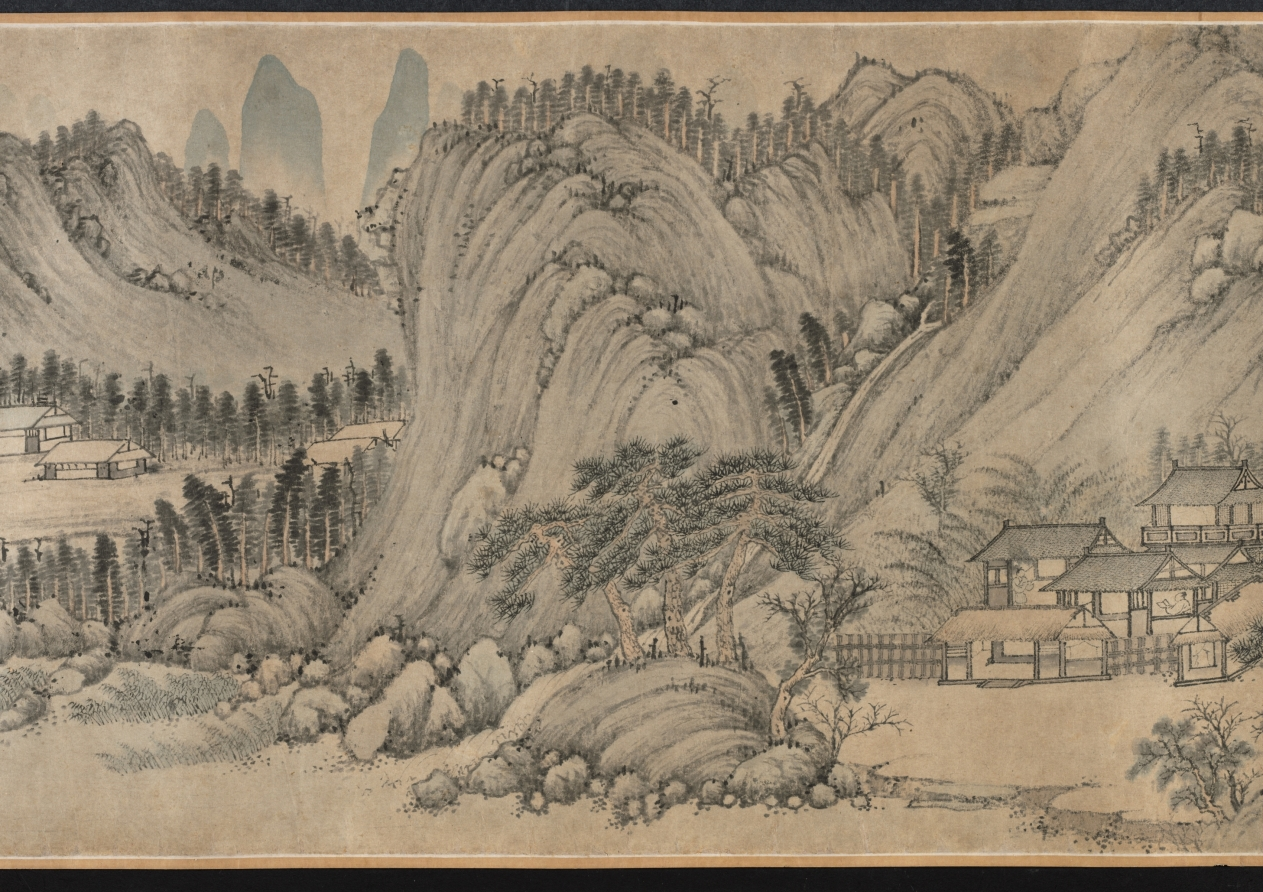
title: Mt. Taibo in the Style of Wang Meng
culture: China, Ming dynasty (1368–1644)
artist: Du Qiong (Chinese, 1396–1474)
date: 1442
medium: handscroll; ink and light color on paper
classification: Painting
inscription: Artist's inscription, signature, and 11 seals: [1 seal] Tung-yüan chai. Huang-ho-shan-ch'iao [Wang Meng] painted a painted called T'ai-po Mountain. Its brushwork is superior and admirable, which is very close to Yu-ch'en [Wang Wei, 699-759]. The cleverness of its composition, the maple groves and rustic temples, the inaccessible ravines and autumnal plateaus, the periolous peaks and strange rocks, etc., all seem to be so natural. The paper is only a little over eight feet, but the landscape has the range of a thousand miles. Once you open and note the contents, it is as if one were roaming among the mountain peaks enveloped in mist and clouds, and forgot the dusty world. When I first saw this, I was so mixed with excitement and joy that I could not take my hands off the painting. So I put it on the table, and tried my best to imitate it, forgetting sleeping and eating for about three months before it was completed. Although I do not dare to tread in the footsteps of Huang-ho shan ch'iao, I took great pains to capture his spirit in composition and colors. I do not know whether it would pass the judgment of the experts. On the fifteenth day of the fifth month, the seventh year of the Cheng-t'ung year [1442], inscribed by Tung-yüan, Tu Chiung. [2 seals] Yung-chia; Ching-chieh ming-men. [8 seals on painting] Tung-yüan chai; Ching-chieh ming-men; Yung-chia; Tu Ch'iung yin; Tung-yüan (repeated 5 times). trans. WKH/LYSL 3 colophons and 7 additional seals: 1 colophon and 2 seals of Chou Ting (1401-1487); 1 colophon and 2 seals of Wu K'uan (1435-1504); 1 colophon, dated 1655, and 2 seals of Lan Ying (1585-after 1664).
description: When a Chinese painter "imitated" a painting by a past master, the intention was never to produce an exact copy. Du Qiong, the Ming painter from Suzhou, is a case in point. The painting style of this handscroll is actually closer to that of Huang Gongwang (1269–1354) than to the style of Wang Meng (about 1301–1385). Both masters were active during the previous dynasty and are among the so-called Four Great Masters of the Yuan dynasty (1279–1368). In this painting, the interplay of styles, including Du Qiong's own, contribute to an inner dimension that is more than visual. Mt. Taibo is located in the province of Zhejiang and is known for its scenic beauty. In this scroll, however, it is not depicted literally. The image is an ideal representation of mountains in southeastern China.